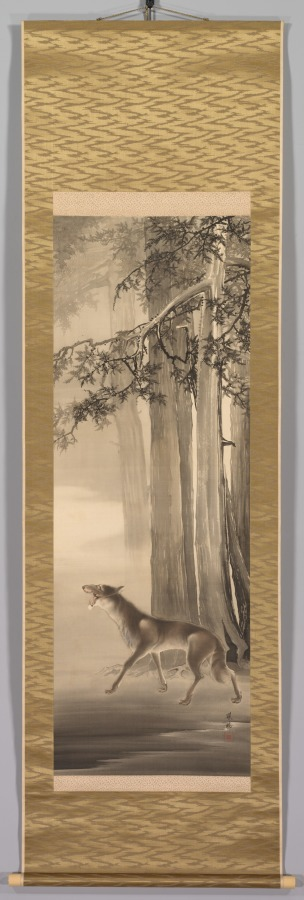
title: Howling Wolf in a Deep Mountain Valley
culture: Japan, Taishō period (1912–26)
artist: Yoshimura Hōryū (Japanese, 1874–1950)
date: 1912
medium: Hanging scroll; ink and color on silk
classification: Painting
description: A wolf howls beneath the tall pines in a misty landscape. The painter was born in the bustling city of Osaka in the Kansai region. He studied with Mori Jihō (1818–1891) and admired the Maruyama school of painters. He was especially gifted at depicting deer, monkeys, tigers, weasels, and other animals.